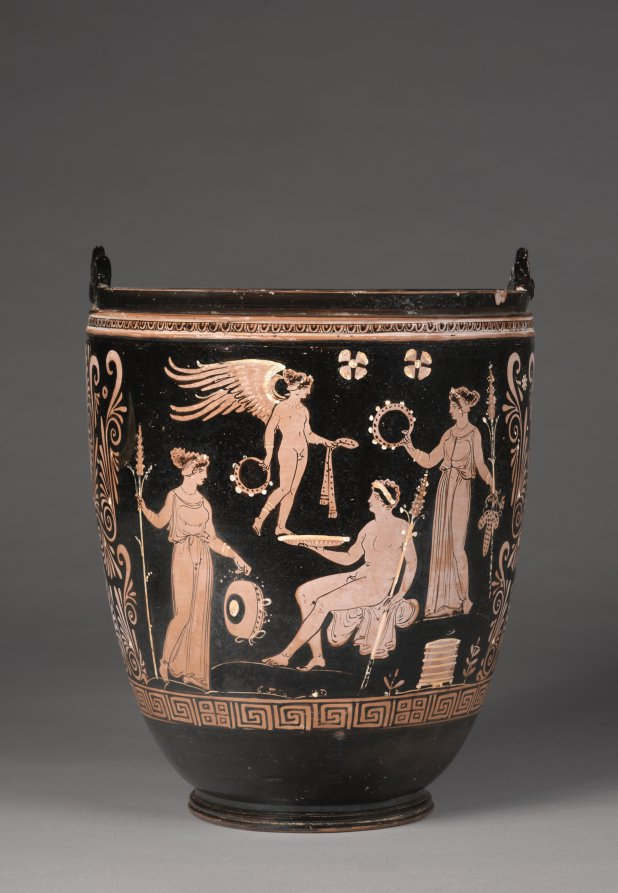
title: Red-Figure Situla (Deep Bucket): Bellerophon Slaying Chimaera (A); Dionysos, Maenads, Eros (B)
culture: South Italian, Apulian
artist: attributed to Group of the Dublin Situlae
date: c. 350 BCE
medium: ceramic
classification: Ceramic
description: The dramatic scene on this bucket-like vessel (known as a situla, more common in bronze) shows the hero Bellerophon astride his winged horse Pegasos, taking aim with a spear at the monstrous Chimaera. Combining parts of a goat and snake with the body of a lion, this fearsome fire-breathing creature lived in Lycia (now southwest Turkey), where fire still burns from natural vents in the rock. Also present on the vase are Hermes and Athena, watching Bellerophon, as well as a small Pan and two young satyrs with stones. Are they taking aim at Pegasos or the Chimaera? Dionysos, Eros, and two maenads appear on the reverse.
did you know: The mythical fire-breathing Chimaera comprises a lion with goat’s head and neck, plus a snake-headed tail.